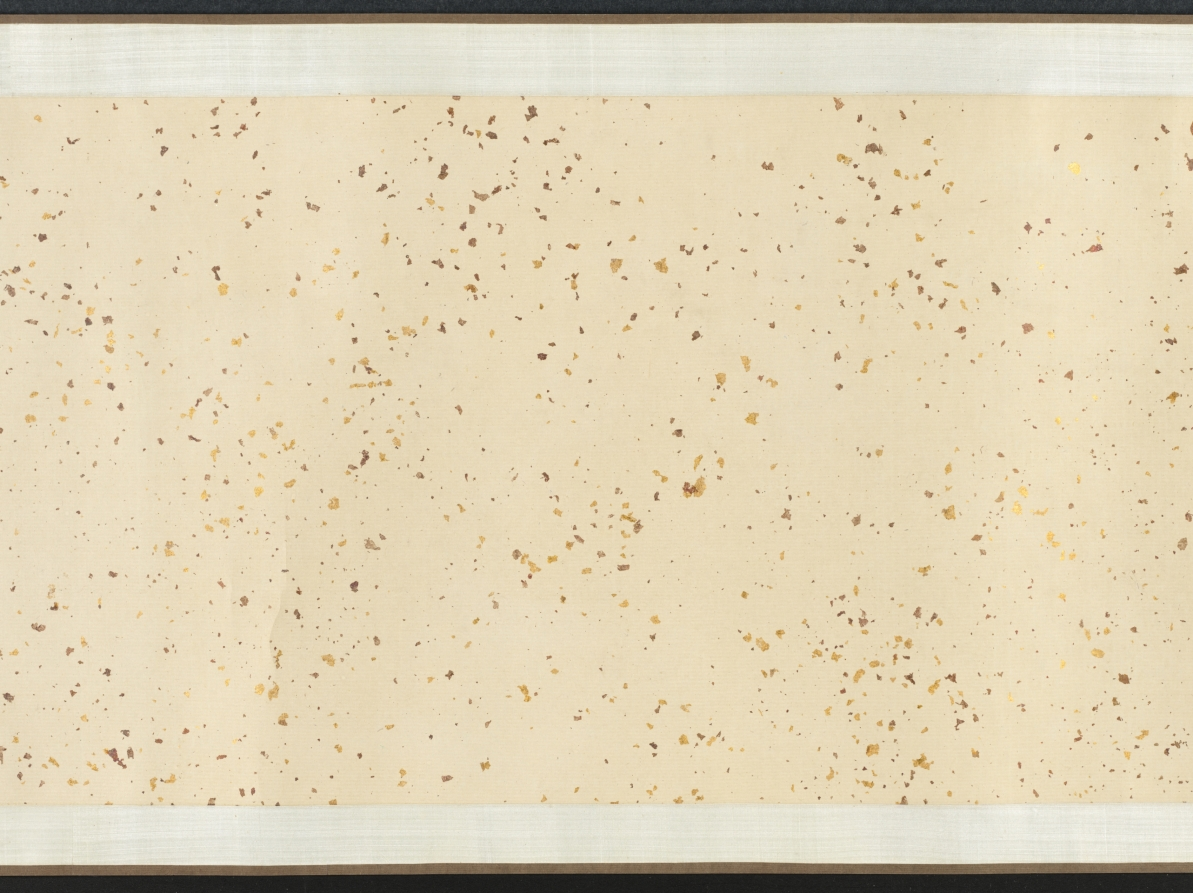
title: Ink Flowers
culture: China, Yuan dynasty (1271-1368)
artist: Zhao Zhong (Chinese, second half of the 1300s)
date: 1361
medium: Handscroll; ink on paper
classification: Painting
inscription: 寶帶同心結，香羅合歡扇。/ 繡作錦鴛鴦，雙雙為君獻。/ 薔薇露灑熏籠衣，馨香奉君君勿違。 原初并題。 [印] 趙衷原初畫記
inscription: 翠袂素羅韈，玉臺黃金盃。浩歌渡弱水。天風卷海三山開，麻姑方平為招飲，蛟宮獻舞銀濤堆。 原初并題。 [印] 雲林清趣、[印] 趙衷原初畫記。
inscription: 右用湯叔雅慶元中所寫墨花法作此卷，又效李長吉體賦詩以題之。詩與畫雖未工，要皆出於古人之餘，譬猶欲成方圓而必求其規矩之用也，識者毋誚焉！至正辛丑八月望日，東吳野人趙衷原初謹識。 [印] 趙原初、[印] 傳世清玩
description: Zhao Zhong's flowers, each paired with a poem, echo the fine-style colored flowers of the academic tradition, but instead he used only ink. Fine lines define the contours of each plant, as well as the veins within each petal and leaf. Careful ink washes give subtle modeling to the forms. The combination of lily, narcissus, and peony is unusual as the three belong to no known seasonal or symbolic system popular in the fourteenth century. Zhao’s medical training may have influenced the selection. Powdered lilies, for example, were prescribed to dispel grief, while the bark of tree peony roots was used as a treatment for various blood disorders.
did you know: This handscroll is a very rare example of ink flowers in the linear baimiao style of the fourteenth century.